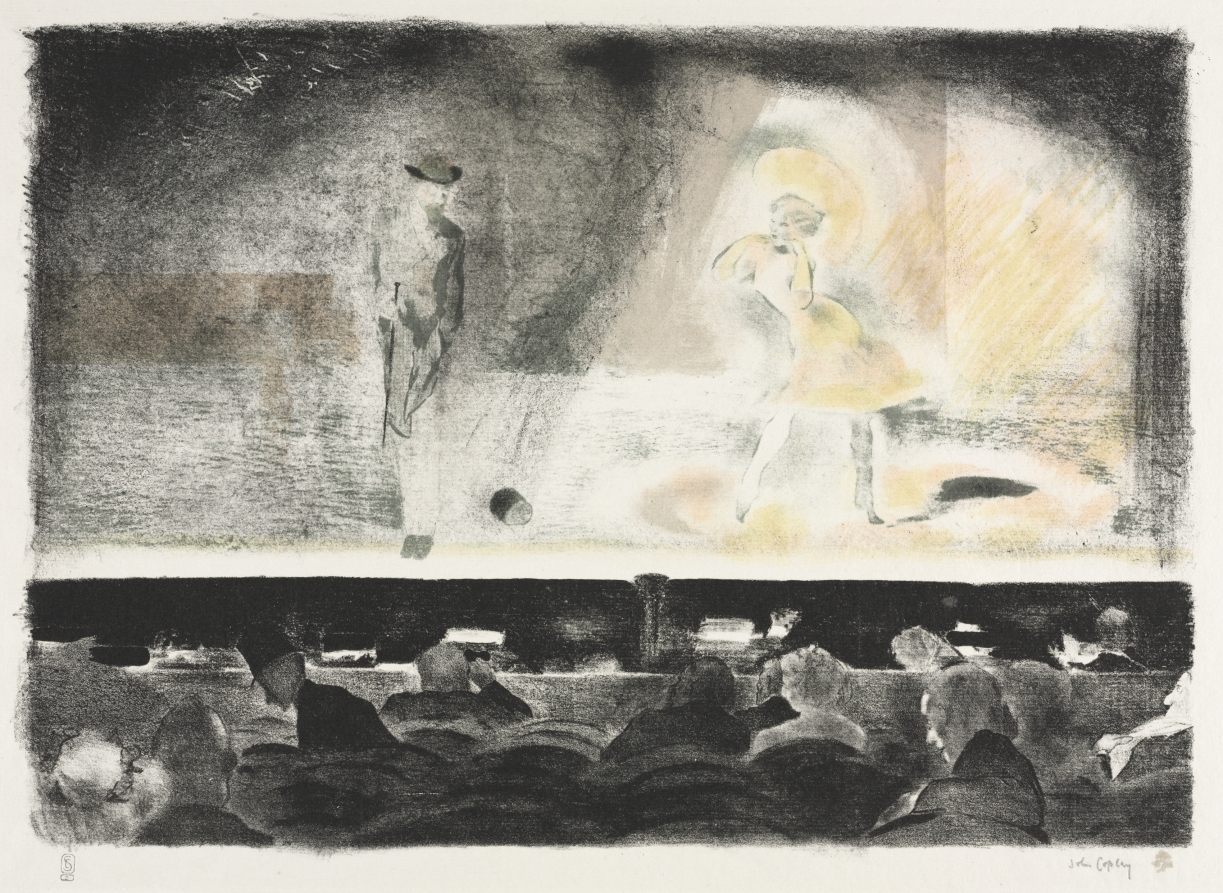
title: Two Actors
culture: England, 20th century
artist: John Copley (British, 1875–1950)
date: 1911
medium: color lithograph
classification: Print